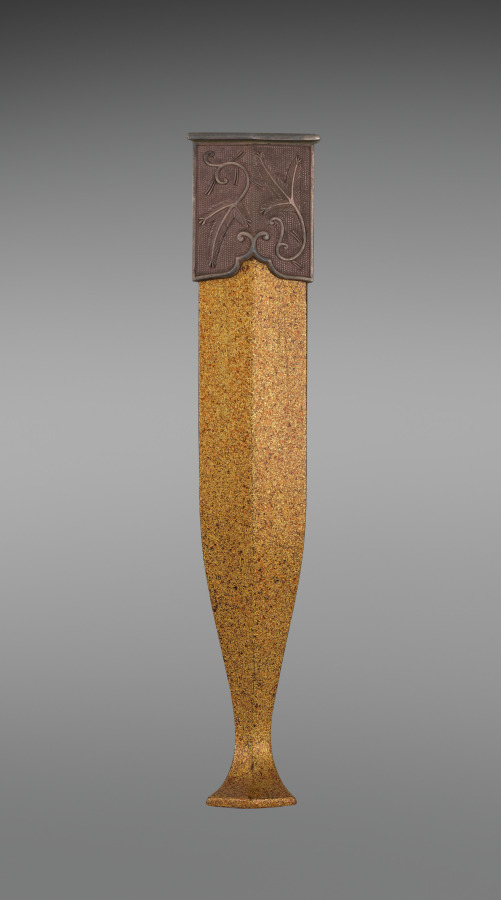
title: Writing Box (Suzuribako) with the “First Song” (Hatsune) Chapter from the Tale of Genji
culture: Japan, Meiji period (1868–1912)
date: early 1900s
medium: Lacquered wood with gold and silver sprinkled powder (maki-e), foil application (kirikane), and metal inlay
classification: Lacquer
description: The design of this box was inspired by an object in the 1639 lacquer wedding set of Chiyohime, the daughter of the shogun (ruler). Information about the set became available in the Meiji period, leading some lacquer artists to emulate its designs. This box features a scene from the chapter “First Song” (Hatsune) of the Tale of Genji, in which Prince Genji and his love Murasaki enjoy her garden. It incorporates the written characters for “first” (初, hatsu) and “sound” (音, ne), indicating the first song of the warbler in spring, associated with the new year—the water dropper for mixing the ink is in the shape of this bird.